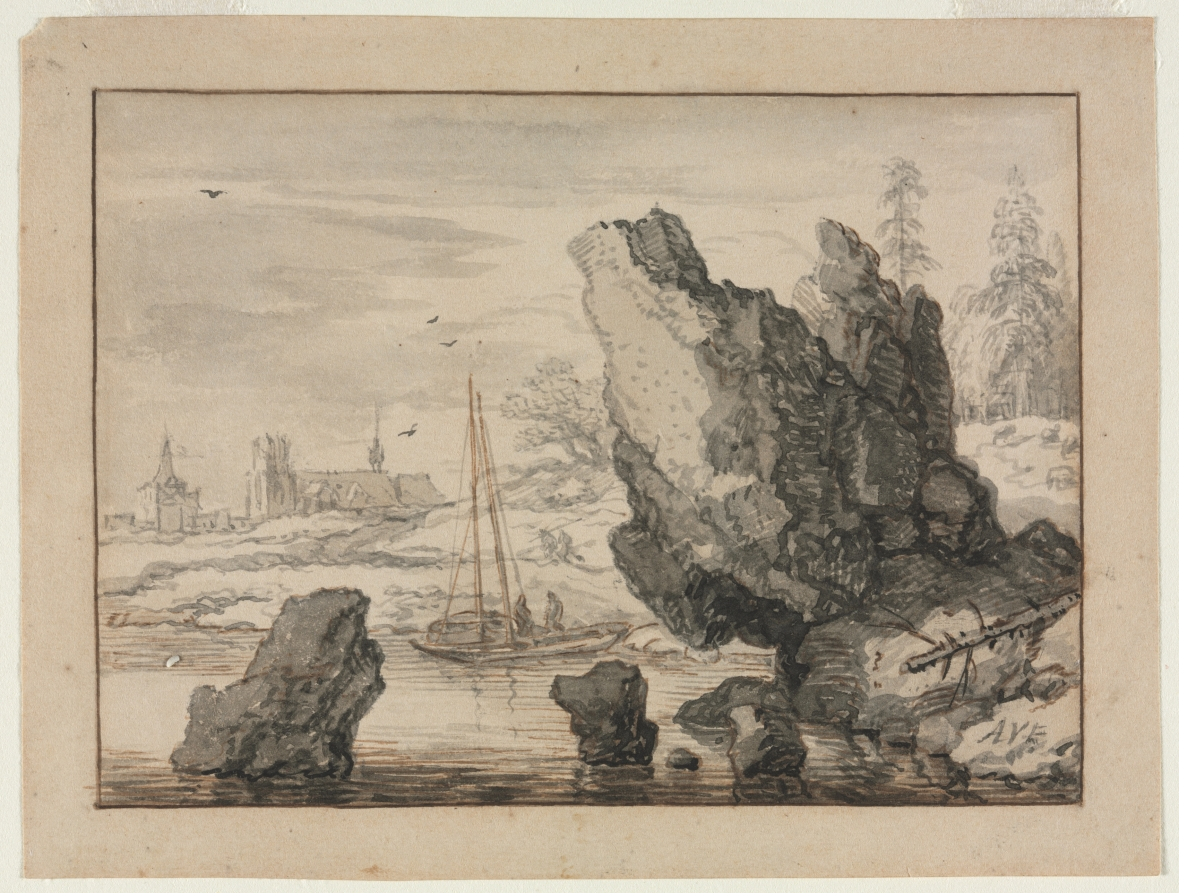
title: A Rocky Cove with Fishing Boats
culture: Netherlands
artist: Allart van Everdingen (Dutch, 1621–1675)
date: late 1650s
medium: pen and brown and black ink and brush and gray and black wash; framing lines in brown ink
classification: Drawing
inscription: signed, lower right, in gray ink: AVE ; VERSO, lower right, in graphite: NB / clean / 4x4